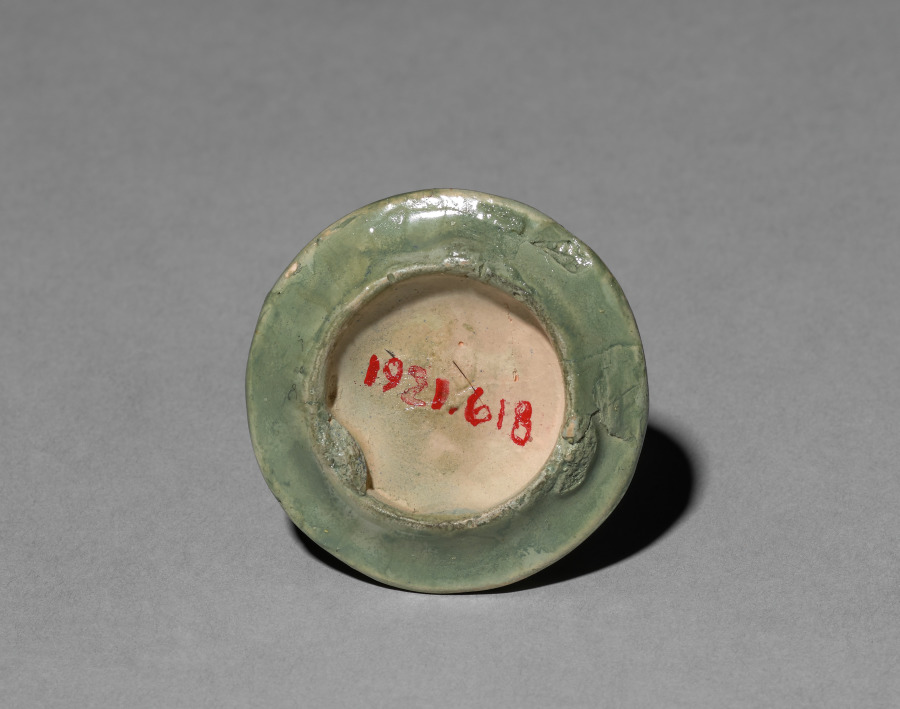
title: Melon-shaped Ewer with Incised Peony Design (lid)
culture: Korea, Goryeo dynasty (918–1392)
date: 918–1392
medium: plaster with acrylic paint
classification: Ceramic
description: This melon-shaped pitcher is adorned with a delicate drawing that renders chrysanthemum buds with full blossoms in white and black inlays. In Korea, chrysanthemum flowers and leaves were made into both tea and wine. Chrysanthemum wine was enjoyed during the the Double Nine Festival (the ninth day of the ninth month in the lunar calendar) when praying for longevity.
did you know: The shape of this pitcher resembles a type of yellow muskmelon cultivated mainly in East Asia.